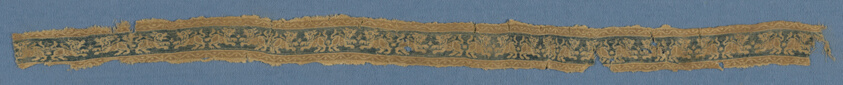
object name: Textile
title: Ribbon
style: roman period (egyptian)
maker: Egypt, Antinöe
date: Roman period (30 B.C.– 641 A.D.), 6th century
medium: Silk, weft-float faced three-color complementary weft twill weave with inner warps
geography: Egypt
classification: textile; weaving